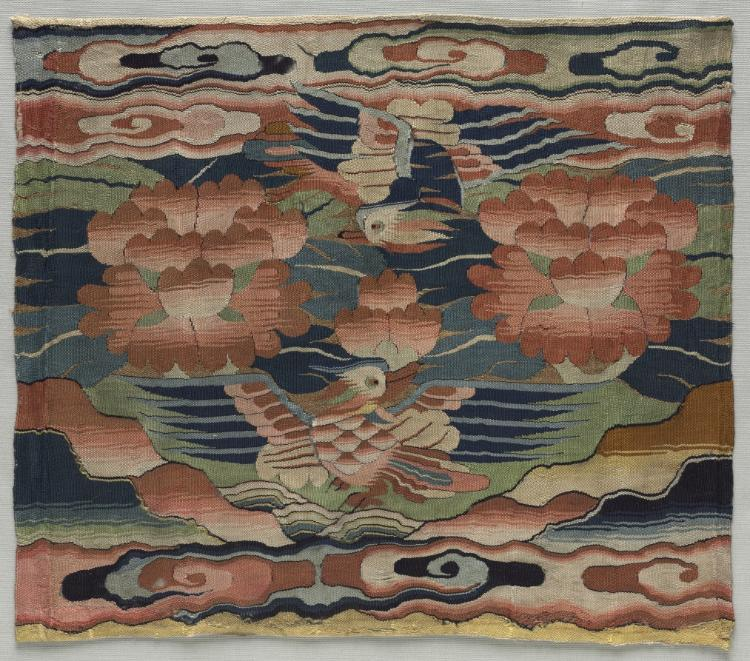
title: Rank Badge (buzi)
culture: China, Ming dynasty (1368–1644)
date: c. 1500–1550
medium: silk; slit tapestry weave (kesi)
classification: Tapestry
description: Rank badges (also called rank insignia or Mandarin squares) were used in China during the Ming (1368–1644) and Qing (1644–1911) dynasties to demonstrate the wearer’s rank. In 1391 new clothing regulations directed court officials to wear decorative squares indicating their rank—birds for civil officials and animals for military officials. During the Qing dynasty rank badge design was regulated, and certain creatures were associated with specific ranks. Qing badges depict a representation of the universe with a landscape and a central creature, surrounded by clouds and facing the sun. The sun represented the emperor and this composition showed the official’s loyalty to him. An official’s wife wore rank badges that mirrored her husband’s. Most of the examples in CMA’s collection depict creatures facing a sun on the left. Attached to the front and back of a ceremonial robe, rank badges were woven in pairs with identical imagery. One was divided vertically up the center to attach to the front of a robe with a center opening. Rank badges are generally square or rectangular, although round examples exist. They are typically satin weave or slit tapestry weave (kesi) silk. Satin weave badges often have dark backgrounds with silk and/or metal thread embroidery. Some badges incorporate peacock feathers or beads. Late in the Qing dynasty appliqué replaced embroidery to allow for quicker production and a change in rank.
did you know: This badge with paired mandarin ducks would have been for a civil officer of the 7th rank.